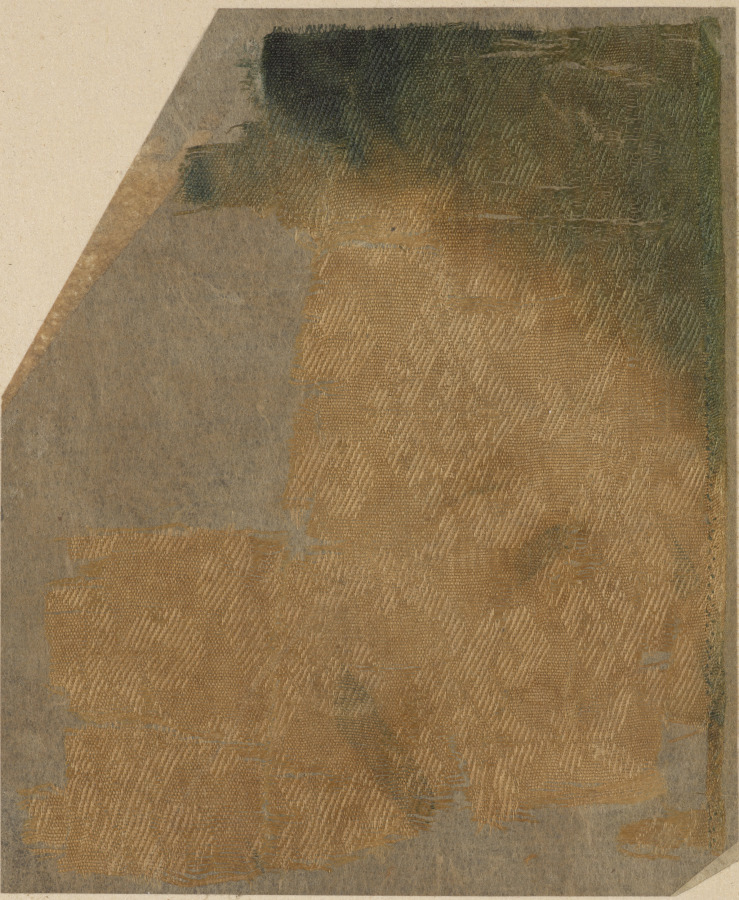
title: Fragment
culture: China or Japan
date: 700s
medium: tabby ground and twill pattern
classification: Textile